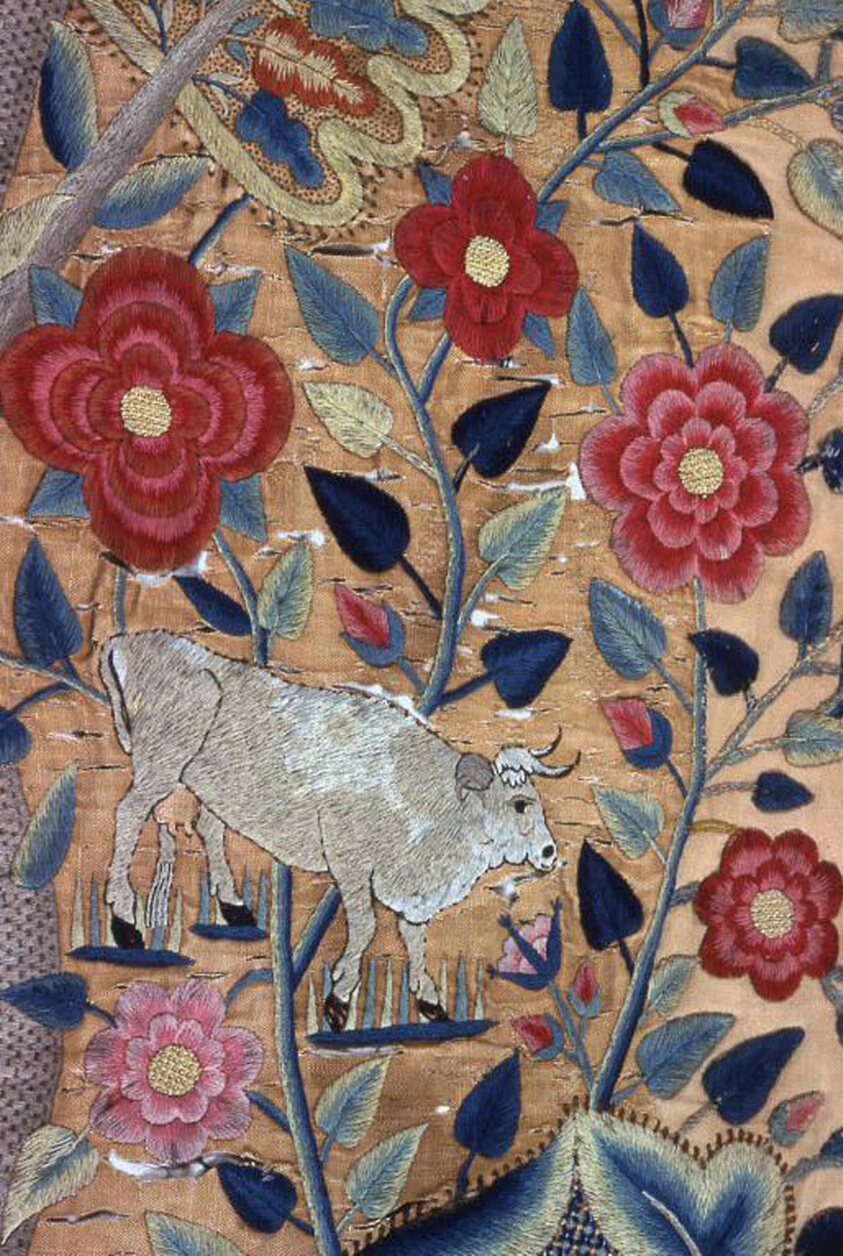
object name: Textile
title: Panel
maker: England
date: 1601/25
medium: Cotton; Jacobean crewelwork; embroidered in satin, knot, outline, brick, cross, long, short, and French knot stitches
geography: England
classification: textile; needlework (visual works)